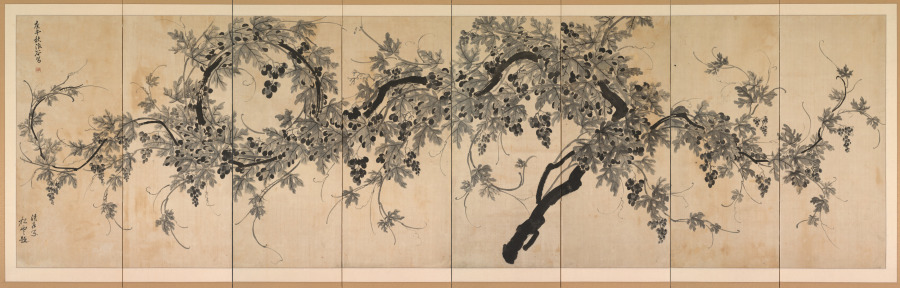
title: Grapevine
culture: Korea, Joseon dynasty (1392–1910)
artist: Choe Seok-hwan (Korean, active first half of 19th century)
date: early 1800s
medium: eight-panel folding screen; ink on paper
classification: Painting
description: July is the season of the ripening deep blue grapes, and also the month when the monsoon season begins in Korea. To the accompaniment of stormy summer wind, grape vines make a spectacular full circle across the surface of this eight-panel folding screen. The artist employed a variety of ink tones to create a sense of swift movement of grapevines amid turbulent storms. Since their first introduction to the Korean peninsula around the 7th century through the Silk Road, grapes were used as artistic motifs. Artists embellished the surface of mother-of-pearl lacquer boxes or blue-and-white porcelain, while scholar-poets composed poems about the luscious sweet sourness of green grapes. By the late 19th century, grapes became the icon of fertility: the fruit grows in large clusters of many individual grapes, evoking the image of a stable clan with many descendants.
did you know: Grapes in premodern East Asia symbolize many children.